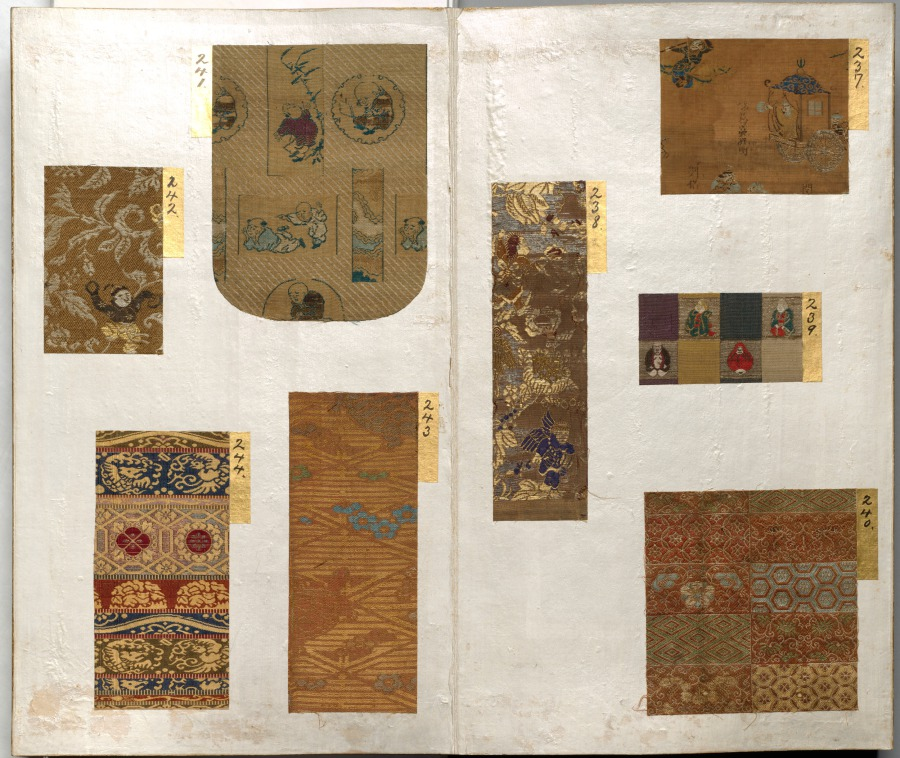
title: Album of Textile Samples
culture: Japan, Edo period (1615–1868)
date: 1600s-1700s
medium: silk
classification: Textile